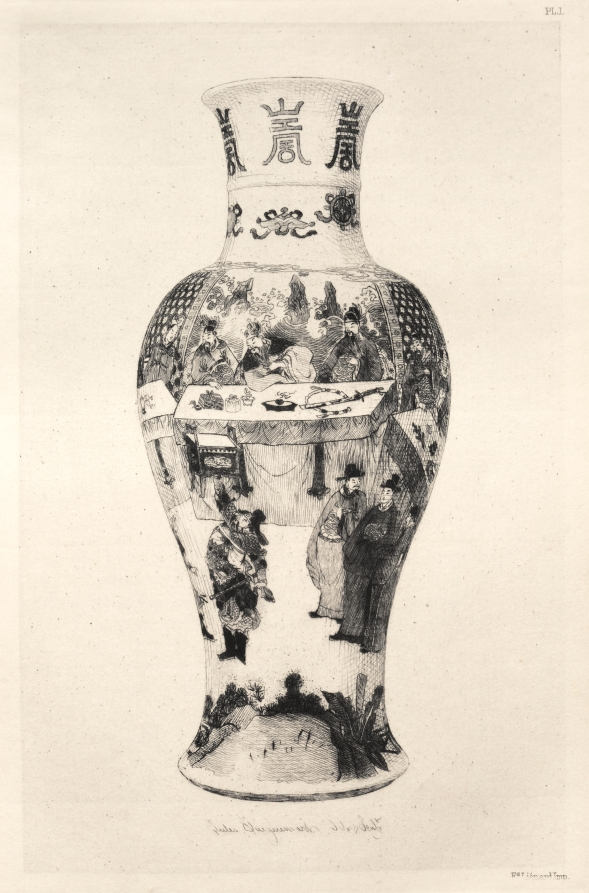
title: History of the Ceramic Art: A Descriptive and Philosophical Study of the Pottery of All Ages and All Nations: China: Porcelain, Colored Upon Biscuit, Teapot, with Raised Handle. Teacup in the form of a Flower (Plate II)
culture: France, 19th century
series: Book by Albert Jacquemart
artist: Jules Jacquemart (French, 1837–1880)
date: 1877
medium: etching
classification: Bound Volume